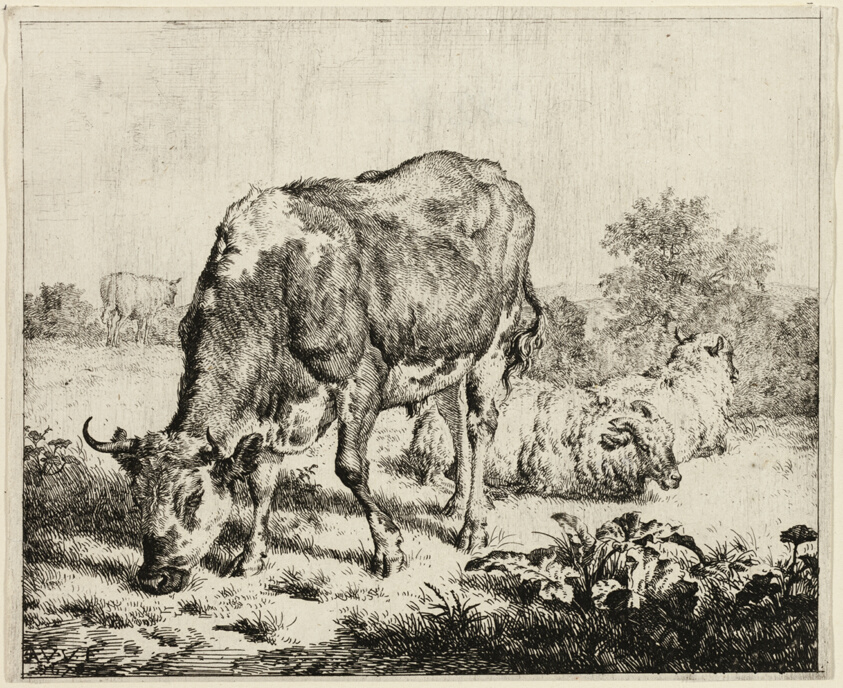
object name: Print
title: A Cow and Three Sheep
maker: Adriaen van de Velde (Dutch, 1636-1672)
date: 1670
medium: Etching on paper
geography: Holland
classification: etching; print; prints and drawing